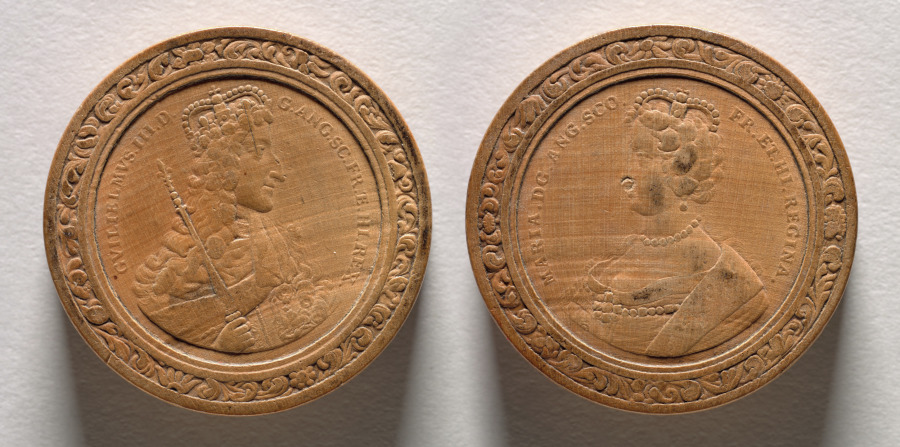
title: Gaming Piece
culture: Germany, late 17th-early 18th Century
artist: Martin Brunner (German, 1659–1725)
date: c.1700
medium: wood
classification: Furniture and woodwork